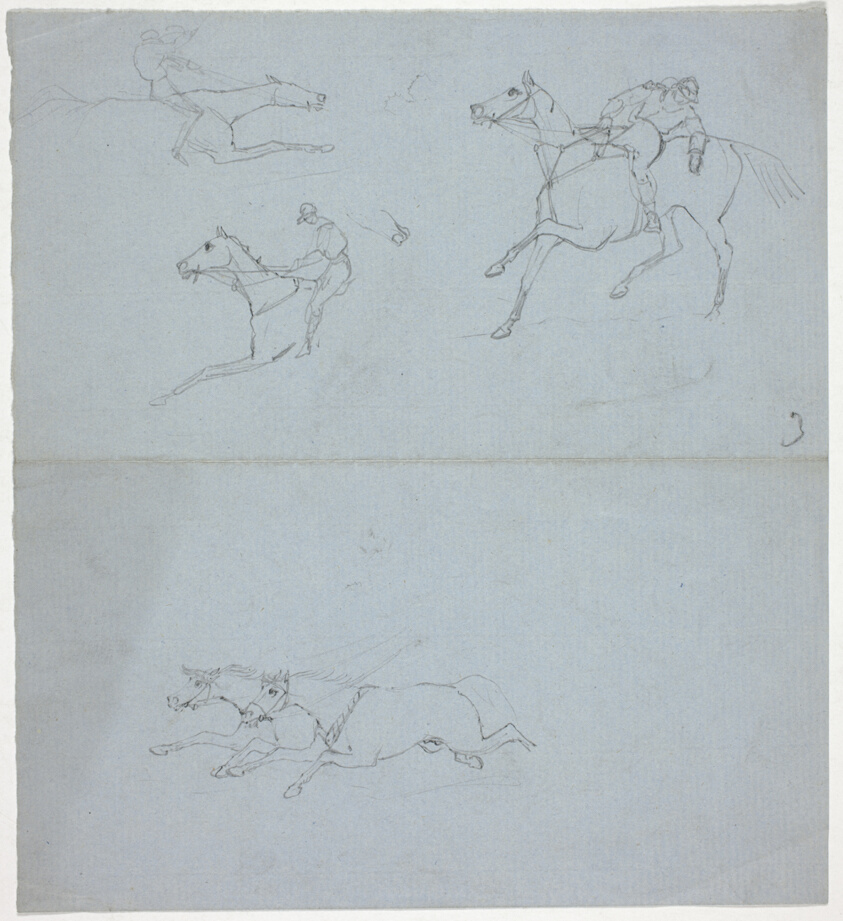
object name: Drawing and Watercolor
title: Sketches of a Jockey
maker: George Alken, II (English, 1812-1862); or Henry Alken (English, 1785-1851) or his style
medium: Graphite on blue laid paper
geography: England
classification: graphite; drawings (visual works); prints and drawing